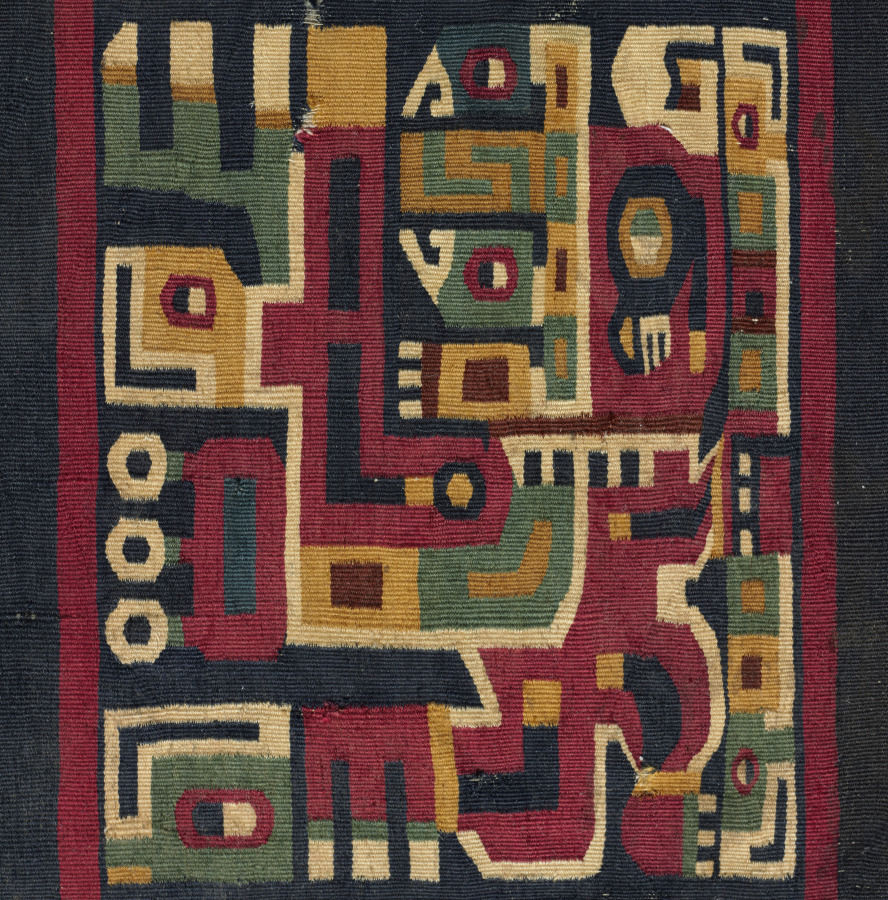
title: Half of a Sleeved Tunic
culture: Central Andes, Middle Horizon, Wari, 6th-11th century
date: c. 500–1000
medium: single-interlocked tapestry; cotton warp; camelid fiber weft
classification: Textile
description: The bird-headed creature in profile that repeats in each of this tunic's design fields gazes upward, holds a staff of authority in front of its body, and wears an ornate headdress behind which a three-feathered wing can be seen. The extremely high technical quality of such tunics suggests that the Wari reserved bird imagery for their most exalted rulers. Here, the original incorporated more than twice as much yarn as the routine--some 19 miles, all handmade and much dyed an inky, dark blue, the most prestigious of Wari colors.